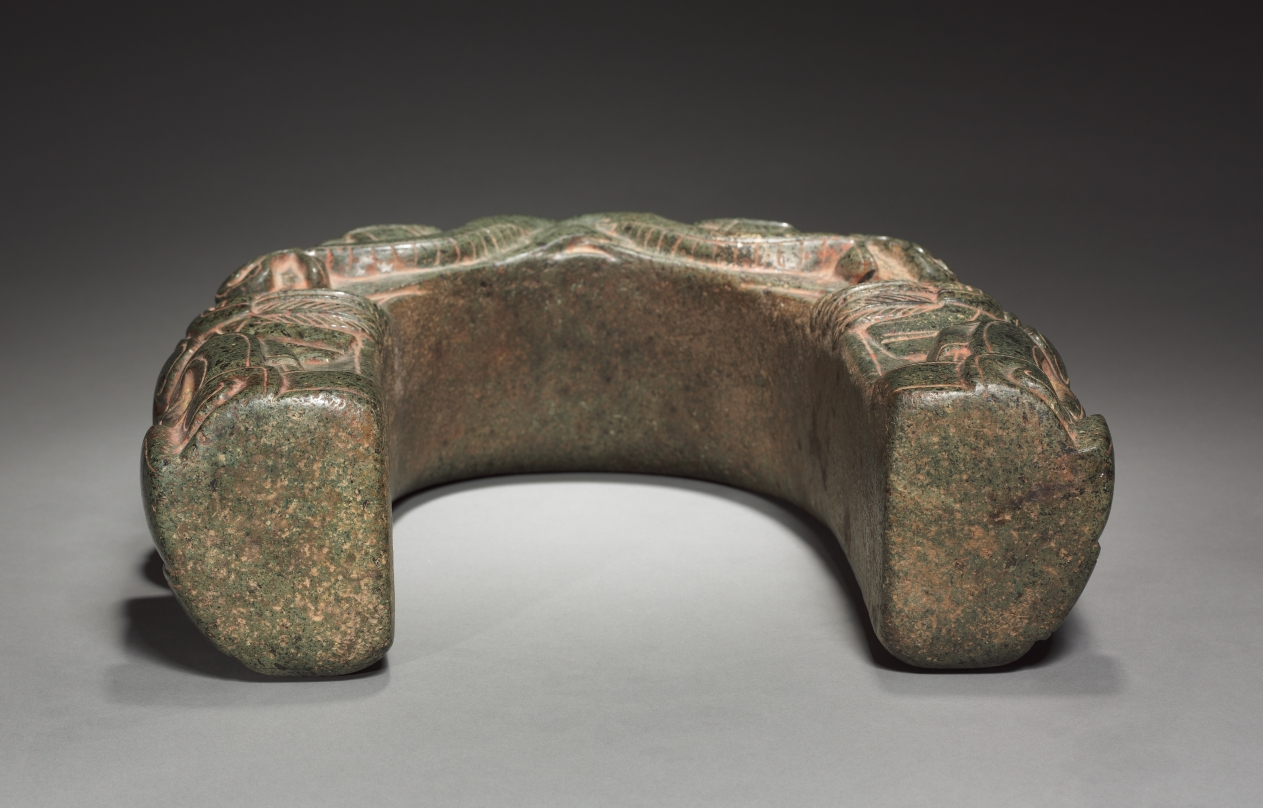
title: Ballgame Hip Protector (Yoke)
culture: Mexico, Gulf Coast, Classic Veracruz style (600-1100)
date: 600–900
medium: greenstone, pigment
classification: Sculpture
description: U-shaped ballgame sculptures imitate the shape of belt-like protectors, perhaps made of wood and padding, worn to shield ballplayers from injury when they returned the solid rubber ball from their hips. This fine example embodies a major theme of the ballgame: the connection between fertility and death. It is made of greenstone, a precious material that through its color symbolizes the lush burgeoning of nature after the rainy season. The imagery, however, is menacing: a monstrous head snarls from the curve, and human skulls appear on the sides.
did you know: The ballgame was a team sport played on specially constructed rectangular courts and involved striking a large solid rubber ball without using your hands.